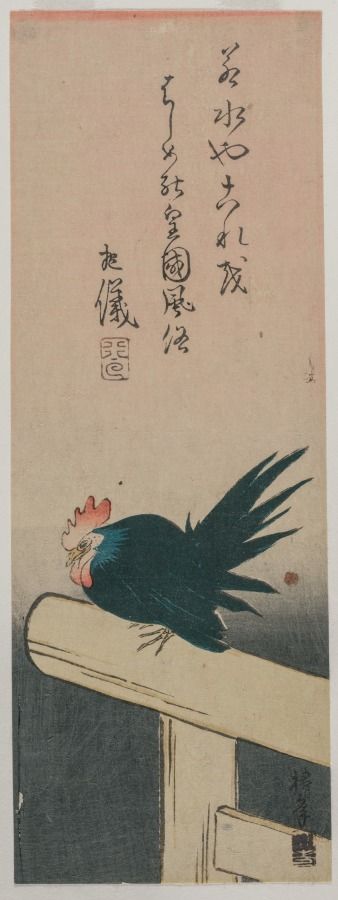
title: Green Rooster Perched on Torii (Shrine Gate)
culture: Japan, Edo period (1615–1868)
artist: Chinnen (Japanese, 1792–1851)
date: early 1830s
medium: color woodblock print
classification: Print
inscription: Signature: Chinnen Seal: Onishi (?)